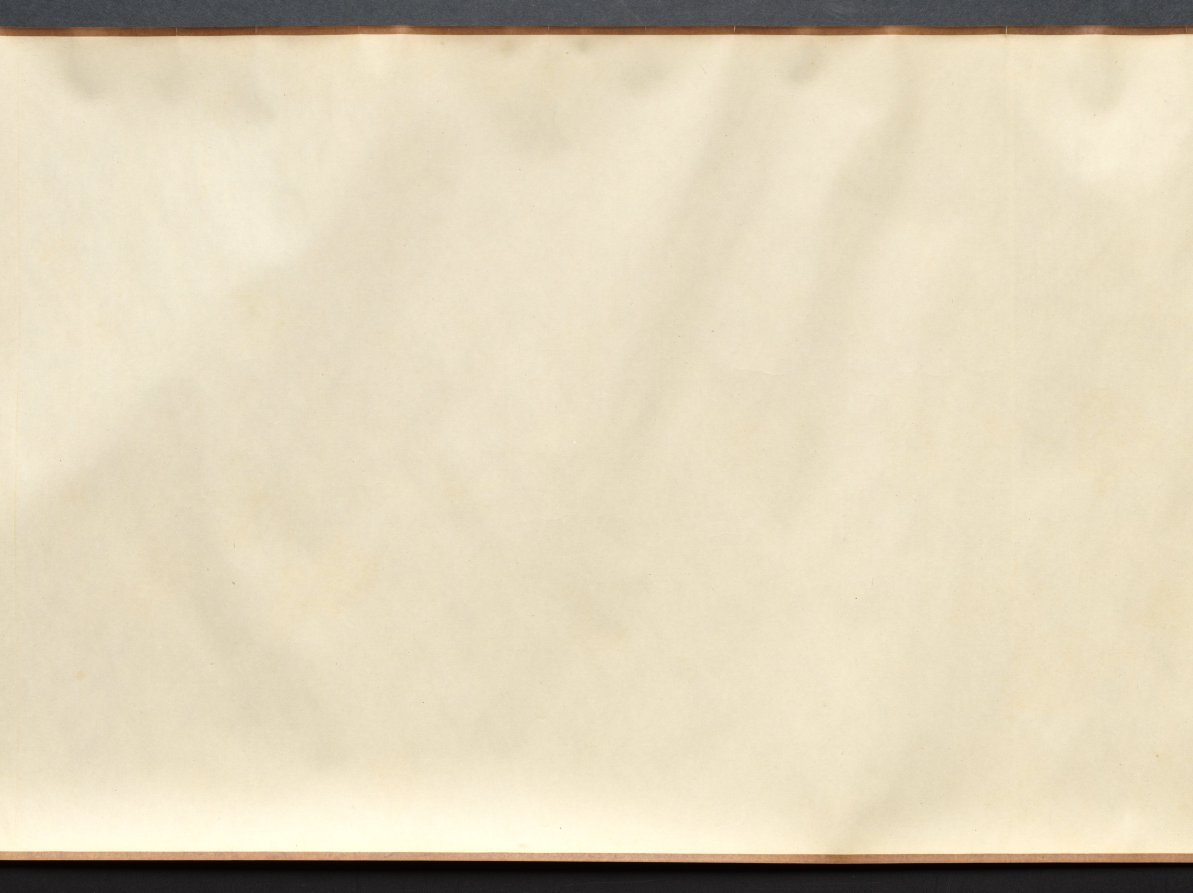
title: Returning to the Village in a Rainstorm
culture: China, Ming dynasty (1368–1644)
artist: Xie Shichen (Chinese, 1487–after 1567)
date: 1530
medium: Handscroll; ink and light color on silk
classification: Painting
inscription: 風雨歸村圖 嘉靖庚寅秋日樗仙謝時臣. [印] 謝時臣印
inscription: 3 additional seals unidentified.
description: This scroll depicts a wind- and rainswept landscape with figures in the countryside struggling against a late summer monsoon rainstorm. Such weather was familiar to residents of the lower Yangzi delta. Xie Shichen spent most of his life in the Suzhou area. Details of his career are scant, but his surviving works suggest that he made his living as a professional painter. This painting conveys drama and anecdotal observations, characteristic of Zhe school paintings, such as the one by Lü Wenying, CMA 1970.76.